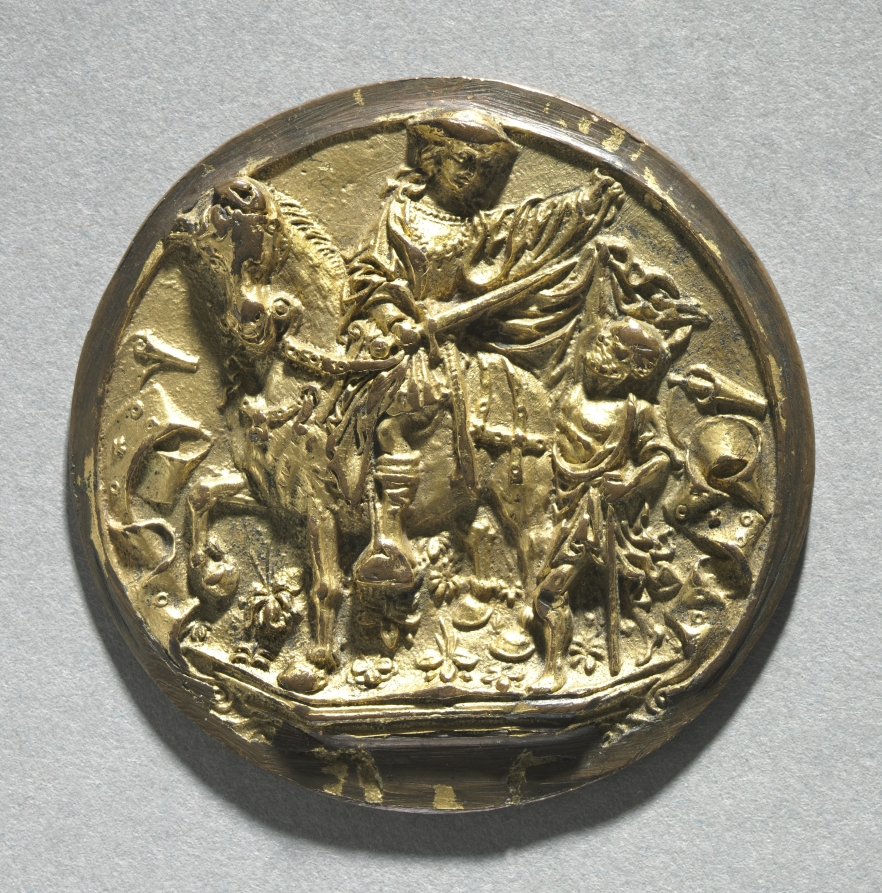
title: Saint Martin and the Beggar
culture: Germany, early 16th century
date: early 1500s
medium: gilt bronze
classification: Sculpture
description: This plate is an appliqué seal, intended as a decorative element for a garment or possibly as a simple pilgrimage medallion. The work tells a story of charity. It depicts Martin of Tours, a French soldier of the fourth century who, when accosted by a beggar at the gates of Amiens, cut a portion of his cloak and gave it to him. Saint Martin is depicted midway through cutting away his cloak with his saber. The bronze is often attributed to an artist in the northern Netherlands, which is due in part to the popularity of several motifs there at the turn of the sixteenth century. The depiction of plant life, for instance, is highly detailed, recalling Netherlandish scenes of the time. A similar seal (now in Berlin) belonged to Johann Potken, who was the provost of the Monastery of Saint Martin. This monastery was located in the now-German city of Emmerich am Rhein, not far from the Dutch city of Nijmegen. Despite the seal's Germanic attributes, the figures' physical qualities suggest the artist's awareness of Italian Renaissance art.